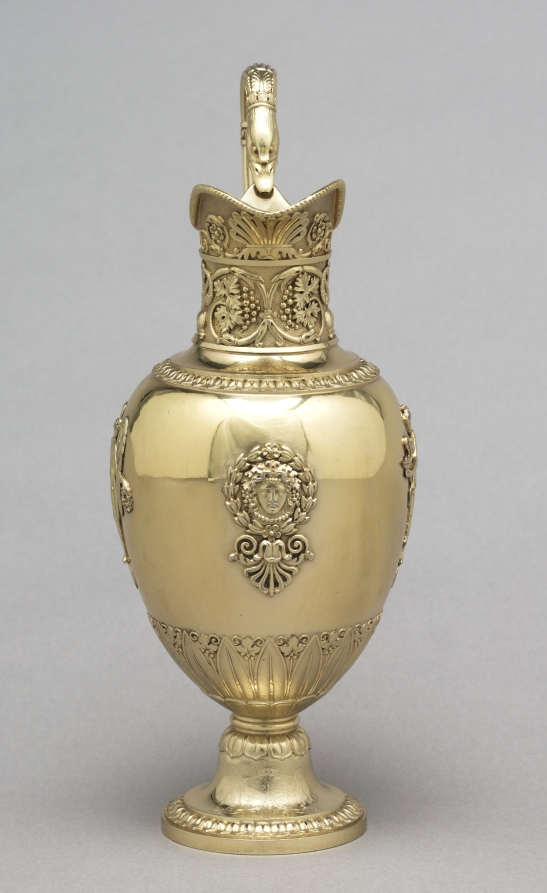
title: Ewer (aiguière)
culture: France, 19th century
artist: Jean Baptiste Claude Odiot (French)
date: c. 1817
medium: silver gilt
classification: Silver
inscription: [Excise mark for medium-sized work, Paris, 1809-1819, on edge of base]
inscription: [Two maker's marks of Jean-Baptiste-Claude Odiot after the Revolution, inside foot]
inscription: [Official assay mark for first standard silver, Paris, 1809-1819, near exterior upper rim]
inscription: [Applied coat of arms of the count Alfred de la Chapelle, Seigneur of Morton and Beaulieu, Périgord “accolé” with an alternate version of de la Chapelle, exterior of foot]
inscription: [Struck twice, interior foot]: "ODIOT"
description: Jean-Baptiste-Claude Odiot’s reputation stretched internationally. Commissioned by Russian count Nikolei Demidoff, this ewer was one part of an extensive silver dinner service. Decorated with motifs of classical antiquity, this object’s Greco-Roman silhouette, grape vine frieze, raised mythological figures, and sinuous swan’s neck handle were likely inspired by the designs of Charles Percier and Pierre-François Fontaine, architects of Napoleon I.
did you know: The coat of arms on the foot of this ewer belongs to the count Alfred de la Chapelle who owned this silver dinner service during the second half of the 19th century.